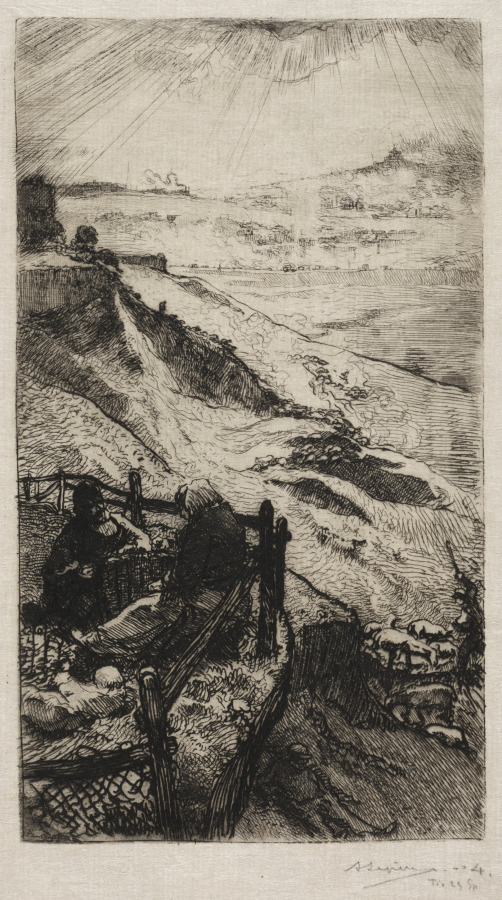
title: Carrirères d'Amérique pres Paris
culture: France, late 19th Century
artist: Auguste Louis Lepère (French, 1849–1918)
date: 1898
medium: etching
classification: Print